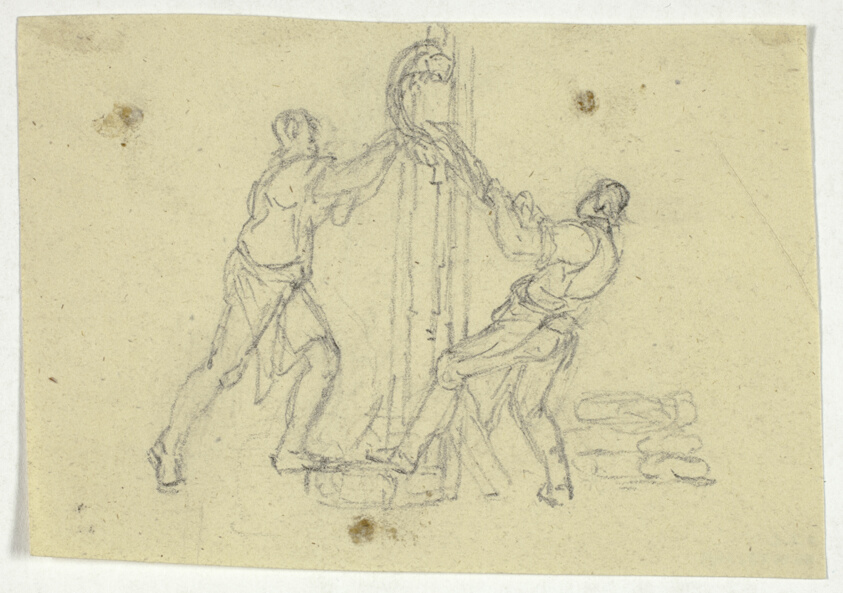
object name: Drawing and Watercolor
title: Two Workmen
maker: William Henry Pyne (English, 1769-1843)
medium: Graphite on cream wove paper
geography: England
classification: graphite; drawings (visual works); prints and drawing